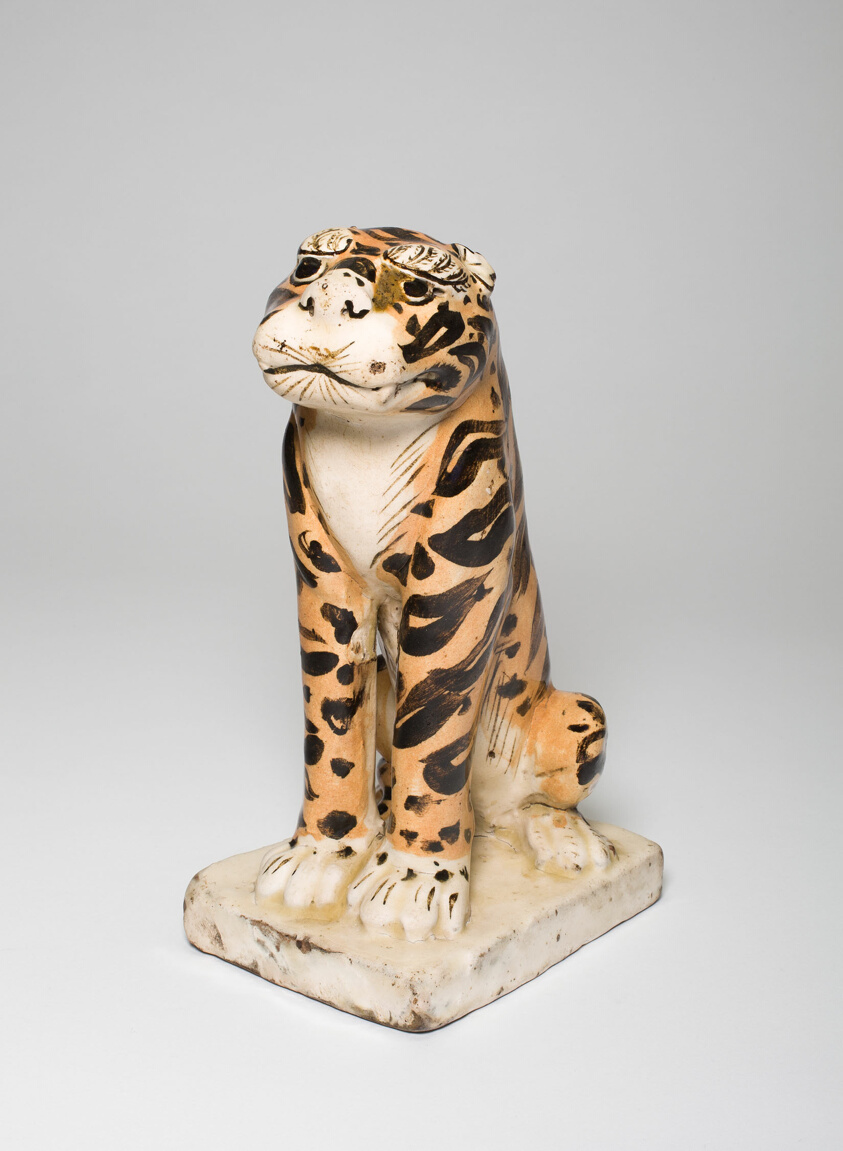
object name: Sculpture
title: Seated Tiger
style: Chinese (culture or style)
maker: China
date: Liao dynasty (907–1125)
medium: Slip-coated and glazed stoneware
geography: China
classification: earthenware; ceramics; sculpture; asian art